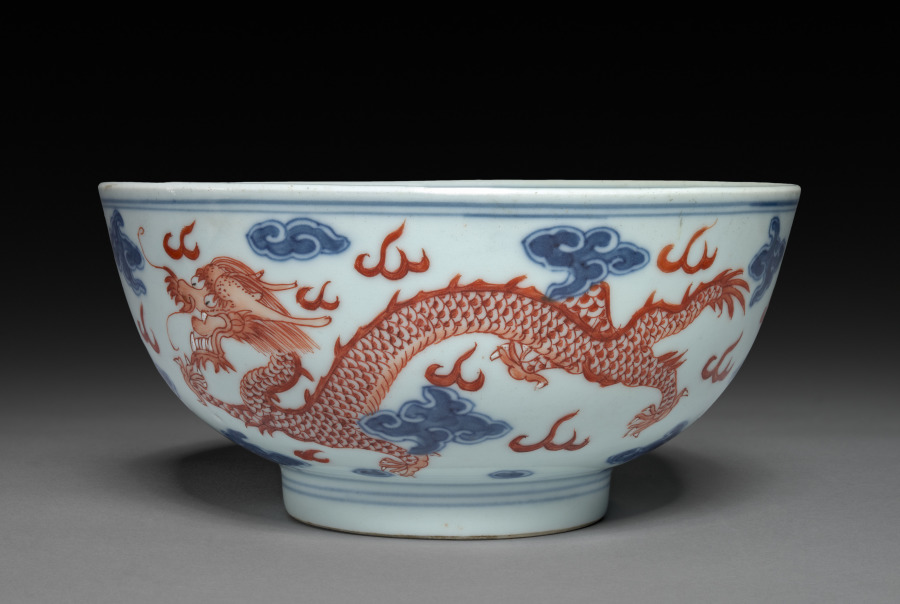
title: Bowl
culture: China, Qing dynasty (1644-1911), Qianlong mark and reign (1736-95)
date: 1736–95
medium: porcelain with overglaze red and underglaze blue enamel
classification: Ceramic